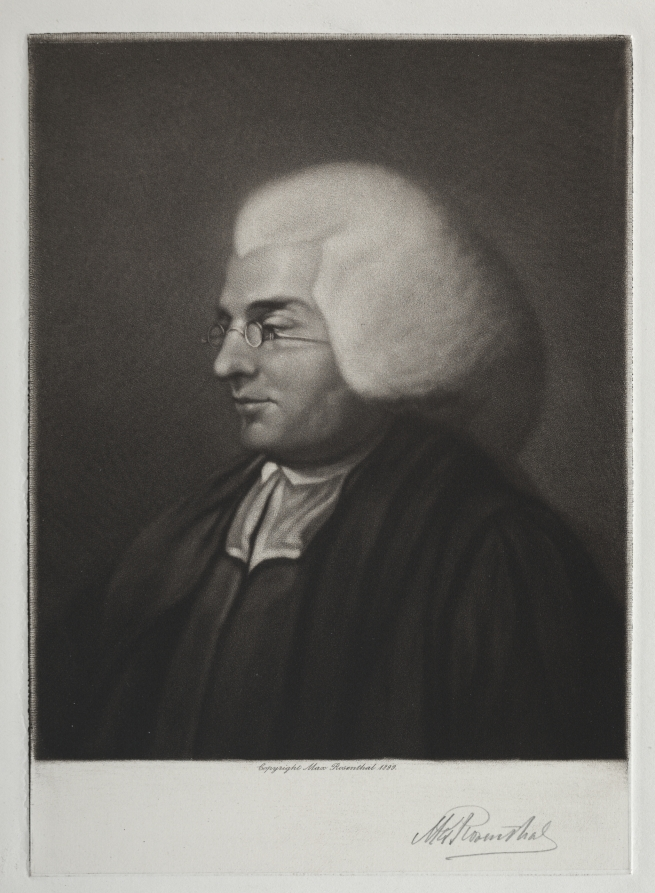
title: Jacob Duche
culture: America, late 19th Century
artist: Max Rosenthal (American, 1833–1918)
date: 1899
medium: mezzotint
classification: Print